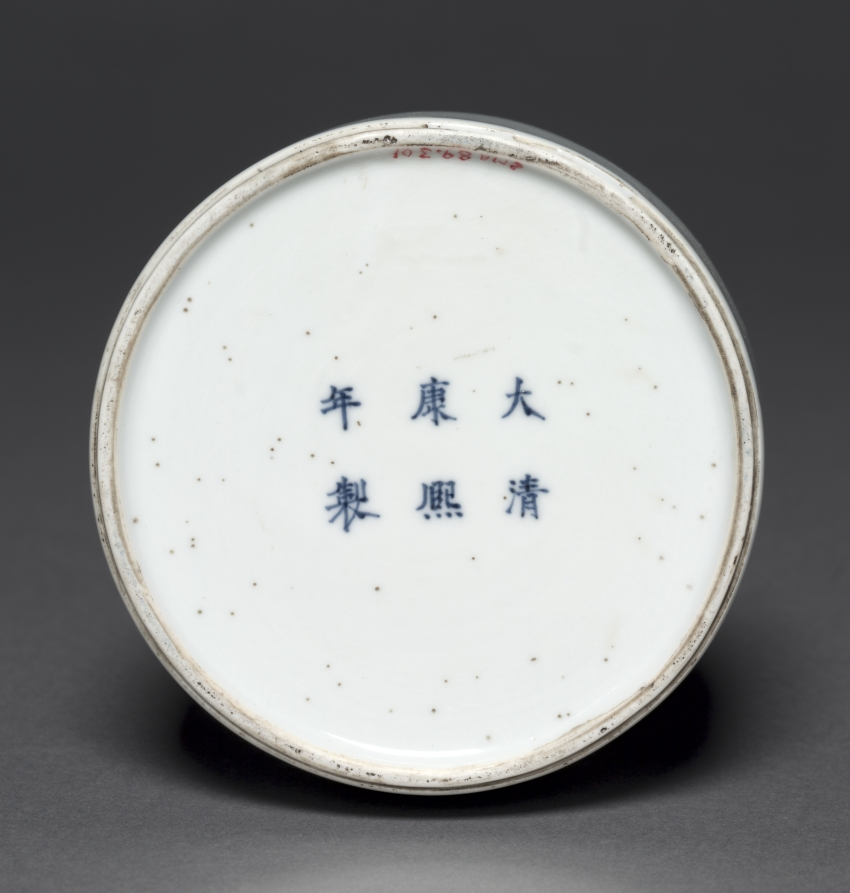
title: Mallet-Shaped Bottle with Phoenixes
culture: China, Jiangxi province, Jingdezhen, Qing dynasty (1644-1911), Kangxi mark and period (1662-1722)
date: 1662–1722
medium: porcelain with underglaze blue decoration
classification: Ceramic